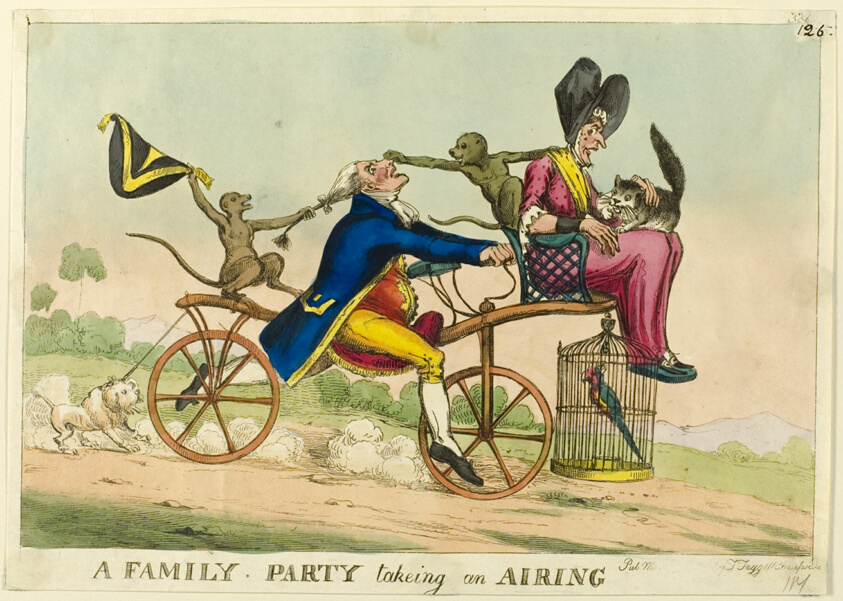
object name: Print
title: A Family Party Taking an Airing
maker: Attributed to William Heath (English, 1794-1840); published by Thomas Tegg (English, 1776-1845)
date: 1819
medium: Hand-colored etching on ivory wove paper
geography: England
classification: etching; print; prints and drawing